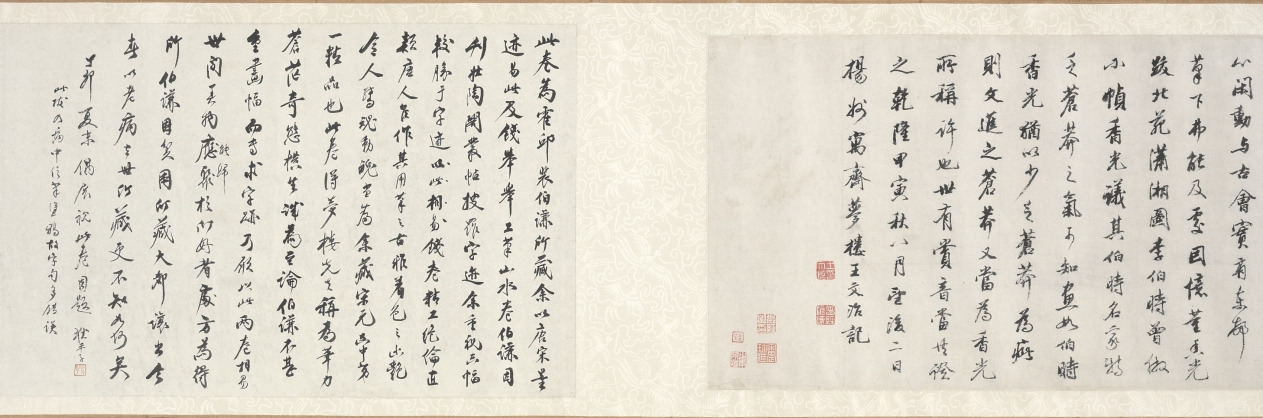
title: Ten Thousand Li of the Yangzi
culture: China, Ming dynasty (1368–1644)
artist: Dai Jin (Chinese, 1388–1462)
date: c. 1400s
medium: Handscroll; ink and color on paper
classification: Painting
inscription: Two colophons at end. Artist's seals: Dai Jin 戴進 and Wenjin 文進.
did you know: Dai Jin is traditionally considered the founder of the Zhe School, a style of landscape painting.